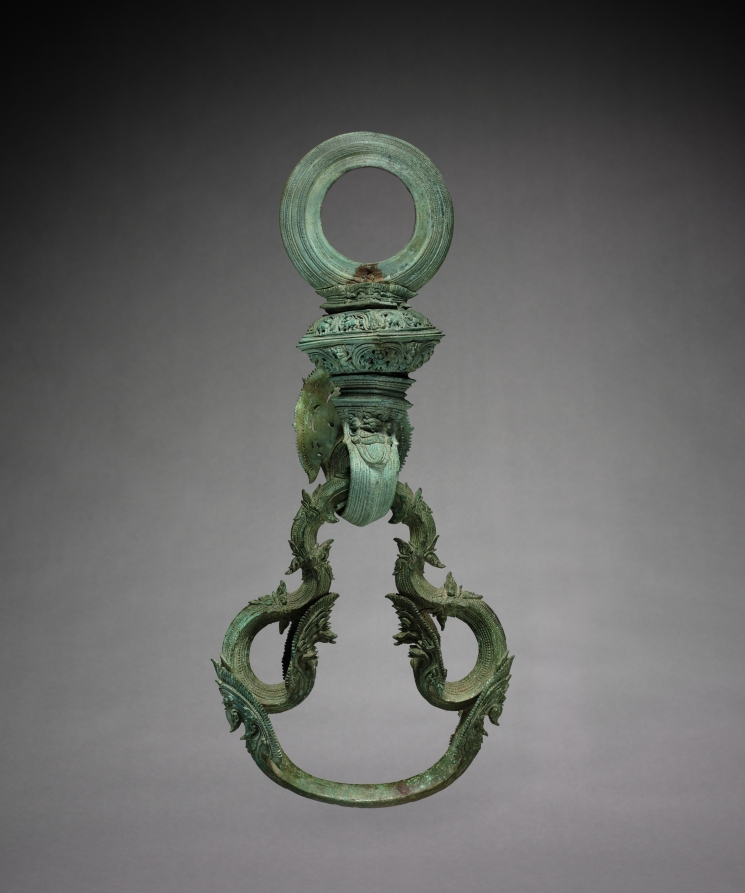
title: One of a Pair of Decorated Palanquin Hooks and Rings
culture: Cambodia, Angkor Wat Style, 12th century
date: 1100–1175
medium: bronze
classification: Sculpture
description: Hooks, suspension rings, and finials cast in bronze are very common fixtures in Cambodian decorative art. Frequently they served a practical function, such as the present set, used for a palanquin in which a person was carried from place to place. The litter or throne was fastened to the rings which in turn were suspended from the books fixed by bolts to transverse poles carried on the shoulders of the palanquin bearers. Chariots, palanquins, furniture, and harnesses were frequently embellished with various bronze decorations, finials, and fixtures. Those, as a rule, were gilded making the objects they served look very sumptuous. The relief sculpture found on various Khmer monuments, such as Angkor Wat or Bayon for instance, illustrates well the use and context of those bronze implements in ancient Cambodian life. These frequently elaborate bronze fixtures were decorated with motifs generally popular in Cambodian art: such as nagas, garudas, floral, or animal patterns. This pair of hooks and rings, unusually large in size, take on a naga form in the hooks. They are decorated with perforated floral and animal motifs done with great care and precision. The rings, suspended from hooks, are in the form of tri-fold flower stalks with naga motifs repeated at the end of the curved stalks. Such elaborate and huge hooks and rings must have, no doubt, decorated a palanquin of an important individual, possible a ruler himself. Their decoration is typical of the mature Angkor Wat style.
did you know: The naga, a water serpent with a multi-headed hood, is a Khmer national emblem.